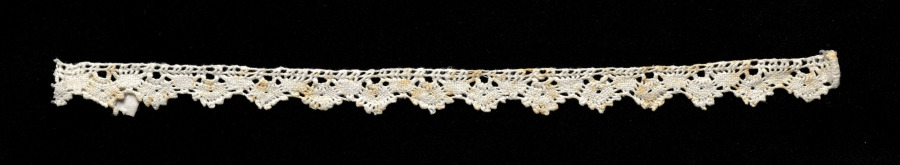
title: Lace Edging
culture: Italy, Abruzzi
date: 1700s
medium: Bobbin lace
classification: Lace